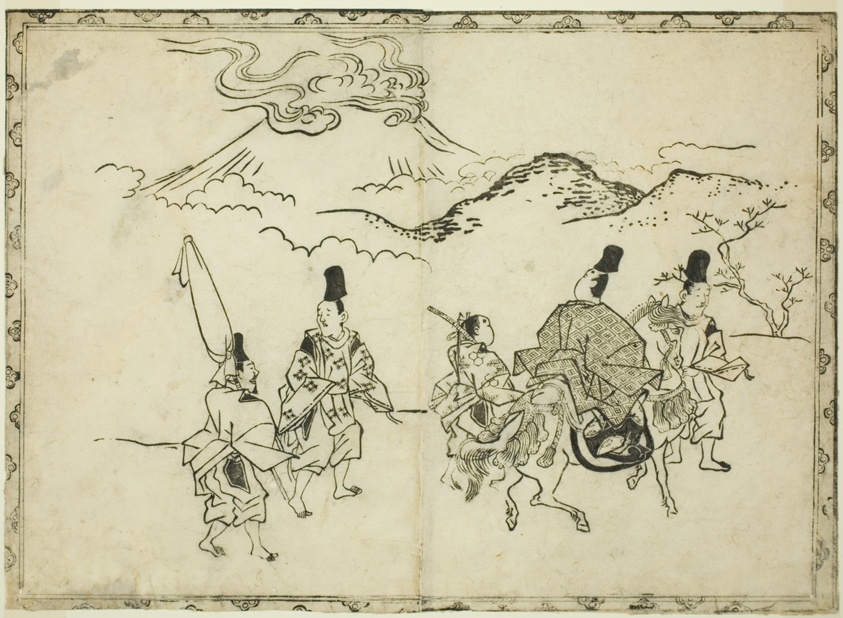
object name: Print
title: Narihira's Eastern Journey, from the illustrated book "Panorama of Paintings on Screens and Hanging Scrolls (Byobu kakemono ekagami)"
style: Japanese (culture or style)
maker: Hishikawa Moronobu (Japanese, (?)-1694)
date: 1682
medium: Woodblock print; double-page illustration cut from a book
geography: Japan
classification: woodblock print; print; asian art; woodblock